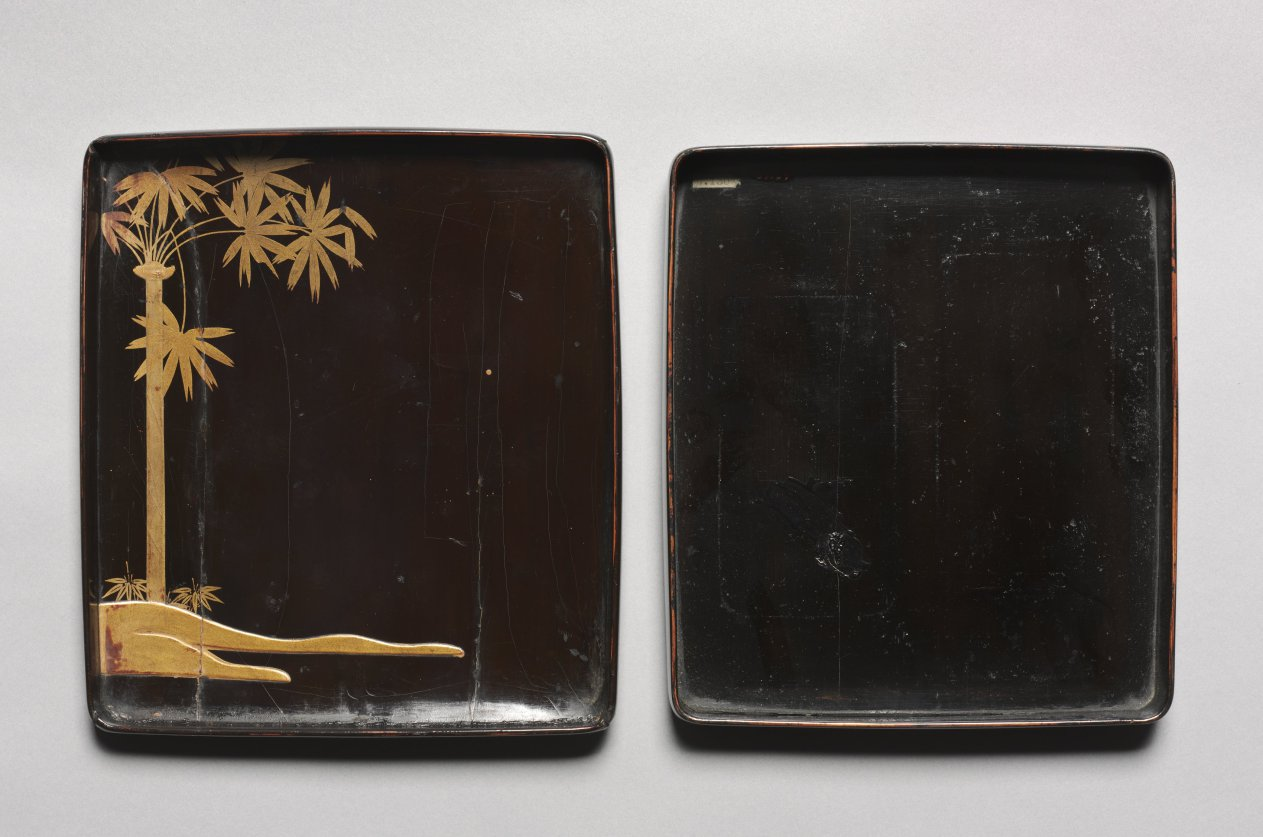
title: Writing Box (Suzuribako) with Europeans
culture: Japan, Edo period (1615–1868)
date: 1800s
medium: lacquered wood with gold maki-e, silver inlay and red lacquer on black ground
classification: Lacquer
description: The two people on the left of this box lid's design are Portuguese traders, identifiable by their balloon-shaped pants. Facing them is a Jesuit priest in a long robe. Portuguese ships arrived in Japan in the 1540s. Imagery first made to document the appearance of the foreigners survived as decoration on later objects like this one.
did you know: The Japanese term nanban 南蛮 is used to describe designs like the one on this box.